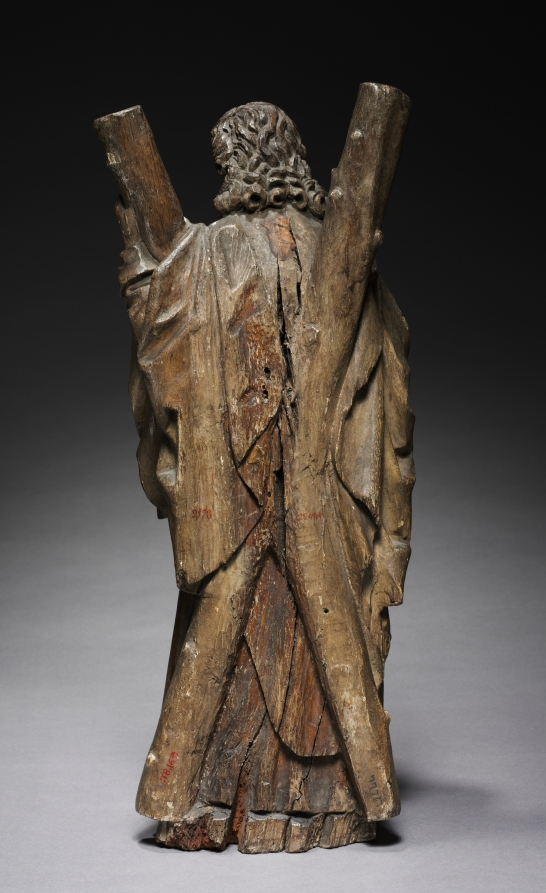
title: Saint Andrew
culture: Netherlands, Elsloo, 16th century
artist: circle of Master of Elsloo (Netherlandish)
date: c. 1515–20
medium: oak with traces of paint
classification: Sculpture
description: Apostle figures such as this were made in large numbers in the eastern Netherlands during the early 1500s. This figure of Saint Andrew, identified by his X-shaped cross, was undoubtedly a single figure from an apostle series. It may have been used above a choir stall in a church, or else part of an apostelbalk, a wooden beam with a figure of Christ at the center. These beams were mounted high above the interior of the church to separate the nave (used by lay people) from the sanctuary, accessible only to the clergy. The artist is named after a multicolored group of Saint Anne with the Virgin and Child, now in the Augustinuskerk in Elsloo, the Netherlands. The sculptor is probably Jan van Oel, who was working in and around Roermond in about 1500–1520. Most of the sculptures attributed to this master are in churches in Belgium and Dutch Limburg and in the neighboring German region.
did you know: Traces of paint found on this sculpture suggest that at one point it was painted.